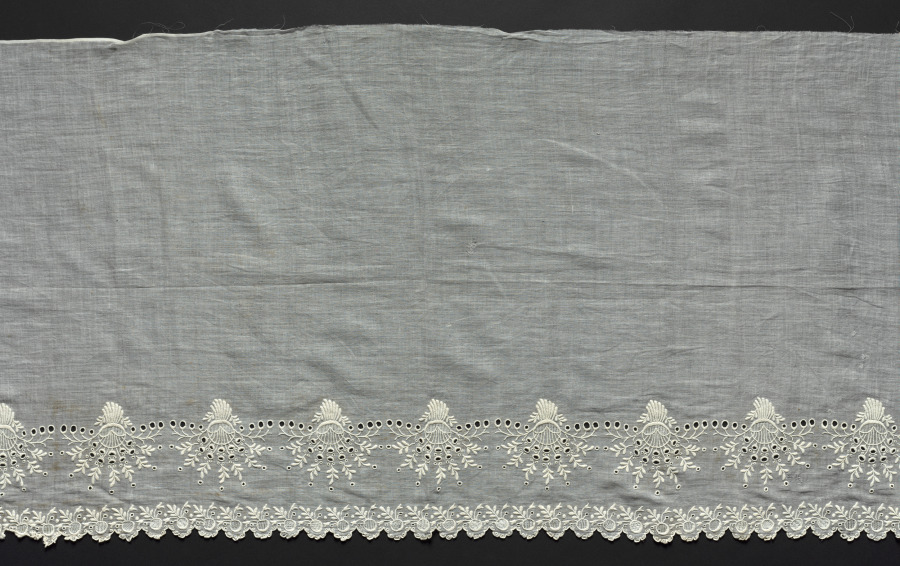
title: Portion of a Flounce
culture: Italy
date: 1800s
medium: Plain weave cotton: needle lace (drawnwork) and embroidery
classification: Embroidery